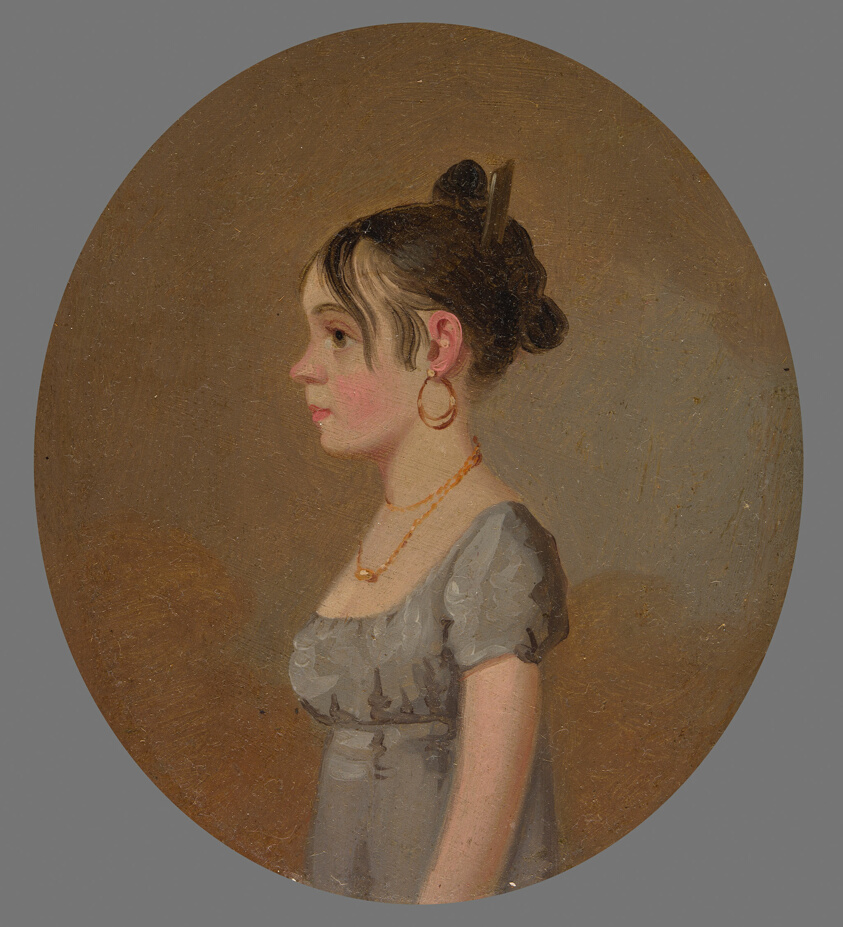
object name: Painting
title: Miss Schaum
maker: Jacob Eichholtz (American, 1776–1842)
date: 1808–10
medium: Oil on yellow poplar panel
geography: Lancaster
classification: painting; american arts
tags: fashion, people, portraits